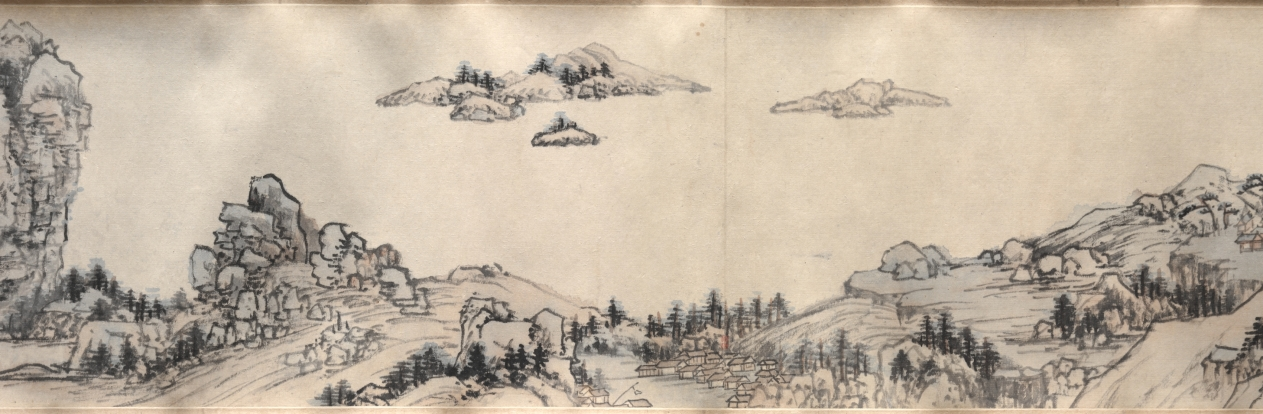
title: Dream Journey among Rivers and Mountains, no. 90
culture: China, Qing dynasty (1644-1911)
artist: Cheng Zhengkui (Chinese, 1604–1676)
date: 1658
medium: Handscroll; ink and color on paper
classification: Painting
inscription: 江山臥遊圖其九十, 青溪道人, 戊戌夏五。 [印] 程正揆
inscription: Title and inscription by Huang Yi 黃易 (1744–1802), and 3 seals.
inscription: 1 colophon and 9 additional seals: 3 seals of Dai Zhi 戴植 (active about 1821–1850); 1 colophon, dated 1914, and 3 seals of Yan Shiqing 顏世清 (1873–1929); 3 seals of Wang Nanping 王南屏 (1924–1985).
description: Cliffs and waterfalls interspersed with trees and dotted vegetation are spread over this handscroll. Long paths wind their way through villages, beside cottages, shrines, and over bridges. In the past, Chinese literati officials liked to take a “dream journey” along mountains and rivers when viewing landscape paintings in their studios. Scenery of this kind thus became a way to escape from the world of bureaucracy and administration. The painter Cheng Zhengkui used the title “Dream Journey” for a whole series of paintings, of which this is number 90. He is said to have painted 500 of them, but the actual count remains unknown.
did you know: Cheng Zhengkui planned to make 100 dream journey paintings but may have ultimately made 500.